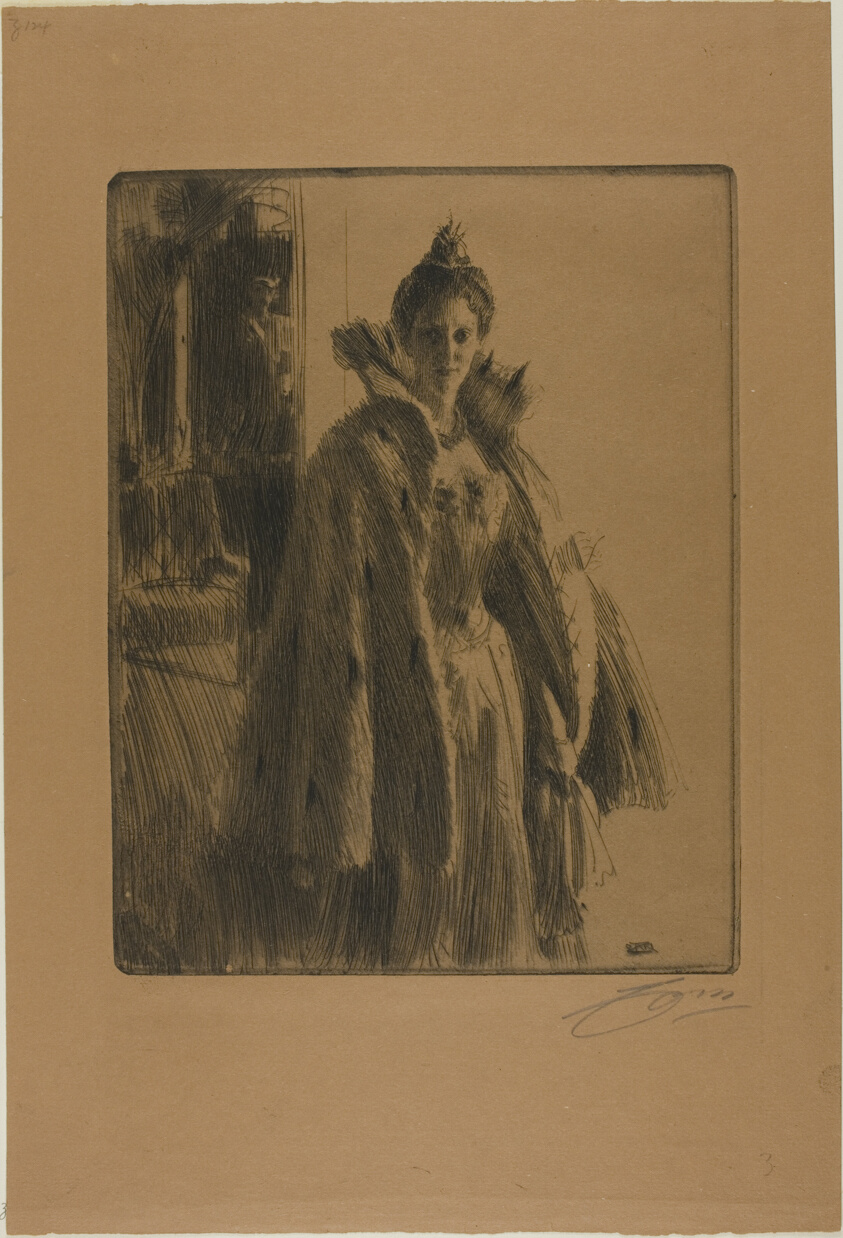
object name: Print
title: H. R. H. Princess Ingeborg of Sweden II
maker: Anders Zorn (Swedish, 1860-1920)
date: 1900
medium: Etching on brown wove paper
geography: Sweden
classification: etching; print; prints and drawing